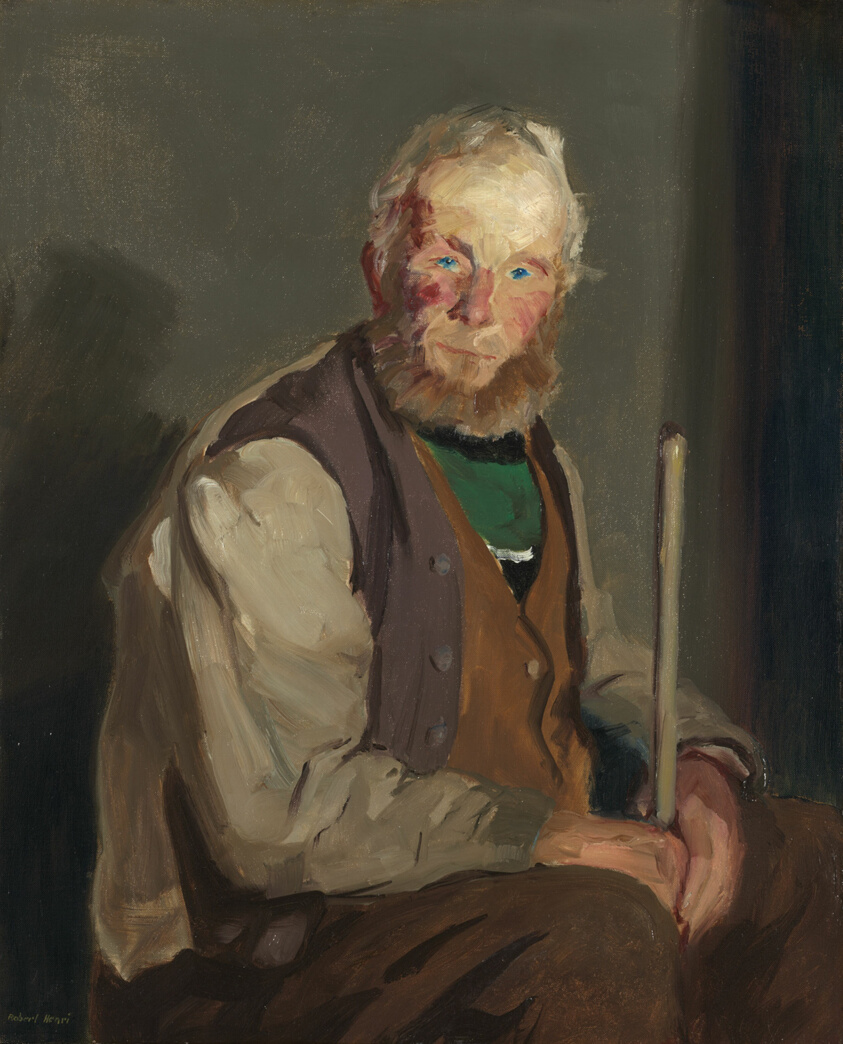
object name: Painting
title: Himself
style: Realism, Modernism, Ashcan School, 20th Century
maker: Robert Henri (American, 1865–1929)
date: 1913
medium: Oil on canvas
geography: United States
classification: painting; american arts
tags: fashion, Century of Progress, world's fairs, Chicago World's Fairs, people, portraits